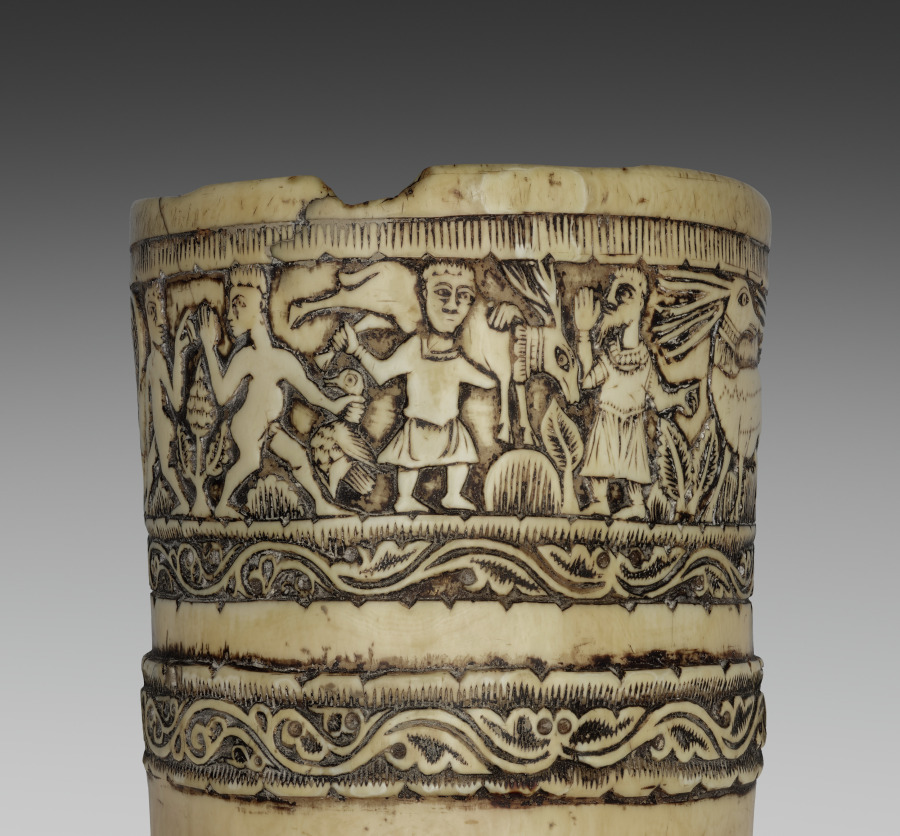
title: The So-called Horn of Saint Blaise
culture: South Italy or Sicily, 12th century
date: 1100–1200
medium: ivory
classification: Ivory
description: This oliphant--a carved elephant tusk in the shape of a hunting horn--was likely carved in an Arab ivory workshop in South Italy or Sicily. It is masterfully shaped, with a series of six carved bands, the outer ring depicting scenes from a hunt. The earliest surviving inventory of the church of Saint Blaise from 1482-85 lists an oliphant decorated with silver rings and precious stones and known as the "Horn of Saint Blaise." By the 17th century, Saint Blaise was reputed to have used this very horn to summon the faithful to worship.